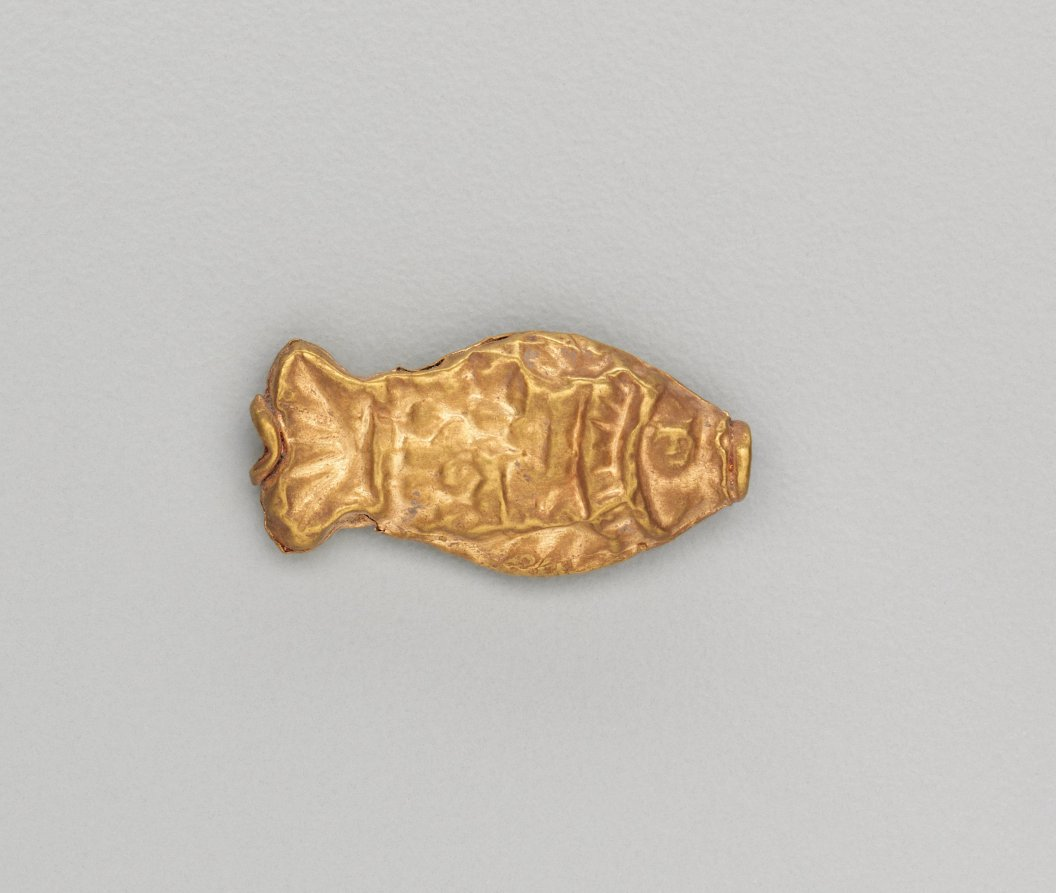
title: Necklace Bead in the Form of a Fish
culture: India, Shunga period (185–78 BCE)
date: 185–72 BCE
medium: gold repoussé with granulation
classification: Jewelry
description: Jewelry in ancient India often consisted of elements associated with water, such as fish and other aquatic plants and animals. Since water is essential for life, imagery that connotes water is life-affirming, or auspicious, and therefore appropriate adornment.